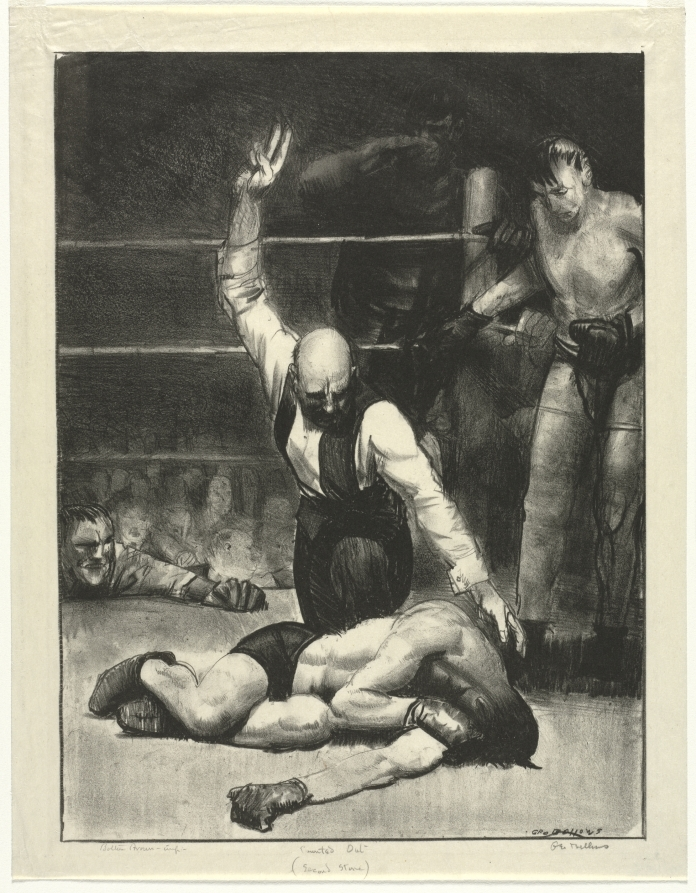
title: Counted Out, Second Stone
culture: America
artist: George Bellows (American, 1882–1925)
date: 1921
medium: lithograph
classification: Print